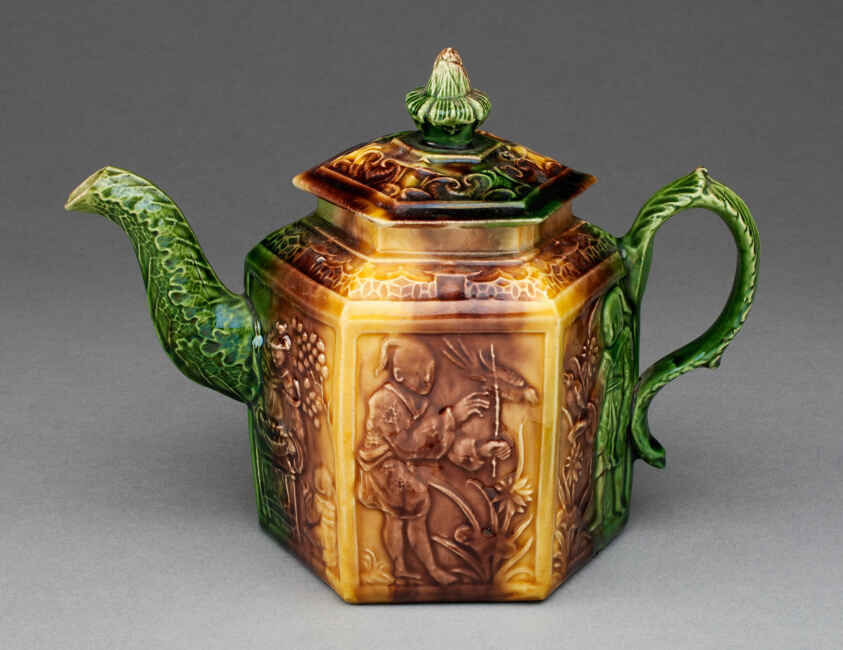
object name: Ceramics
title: Teapot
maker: Staffordshire, England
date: 1750/70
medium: Lead-glazed earthenware (creamware)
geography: Staffordshire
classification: teapot; ceramics; creamware; earthenware; european decorative arts; lead-glazed earthenware